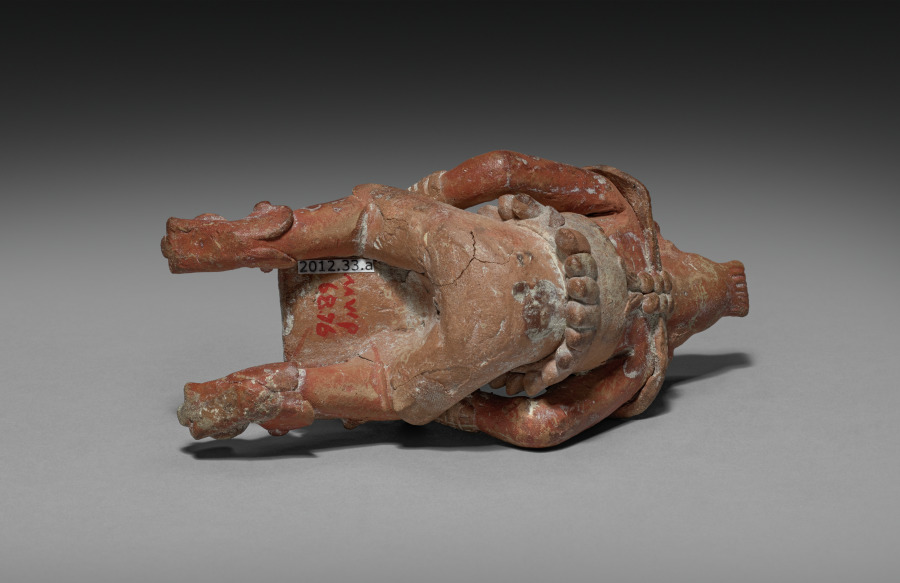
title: Seated Lord with Removable Headdress: Figure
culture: Mesoamerica, Maya, probably Jaina Island, Late Classical period, 7th-9th century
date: 600–800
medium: ceramic and slip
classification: Ceramic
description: The major Maya grave offerings on Jaina Island were ceramic figurines that depict deities and humans in a variety of roles. The seated figure represents a male, perhaps another warrior, who wears a huge zoomorphic headdress. A skeletal face with articulated jaw descends from the headdress to fit as a mask over the figure’s face.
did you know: It is estimated that some 20,000 people were buried on the tiny island of Jaina over a 500-year period.